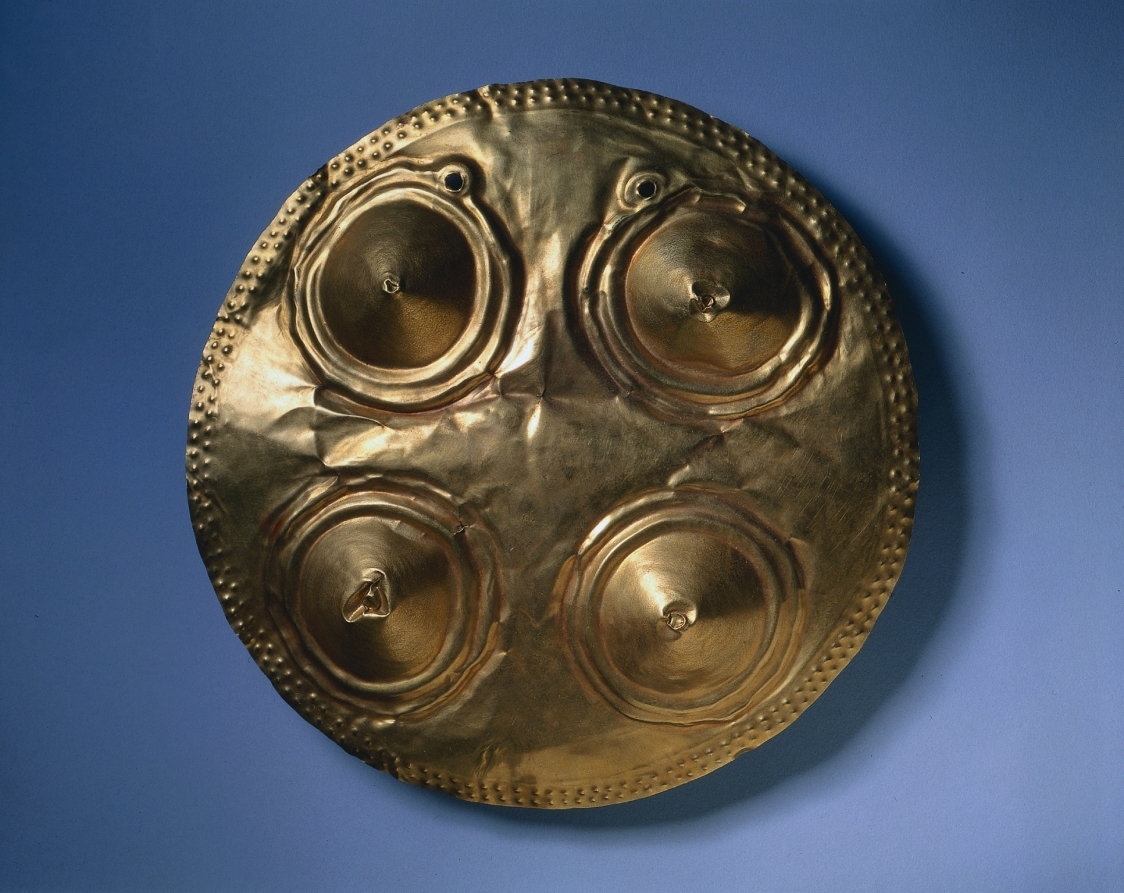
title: Disk-Shaped Chest Plaque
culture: Costa Rica or Panama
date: c. 700–1550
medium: hammered gold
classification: Metalwork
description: Technologically, this pectoral (chest plaque) is unlike the other gold shown in this case. Rather than being cast of molten metal, it was made by hammering metal into a thin sheet. Costa Rican and Panamanian metalsmiths favored casting, but they were skilled in hammering, a technology better suited to creating large objects with glittering, reflective surfaces. The import of the breast-like protrusions is unknown.